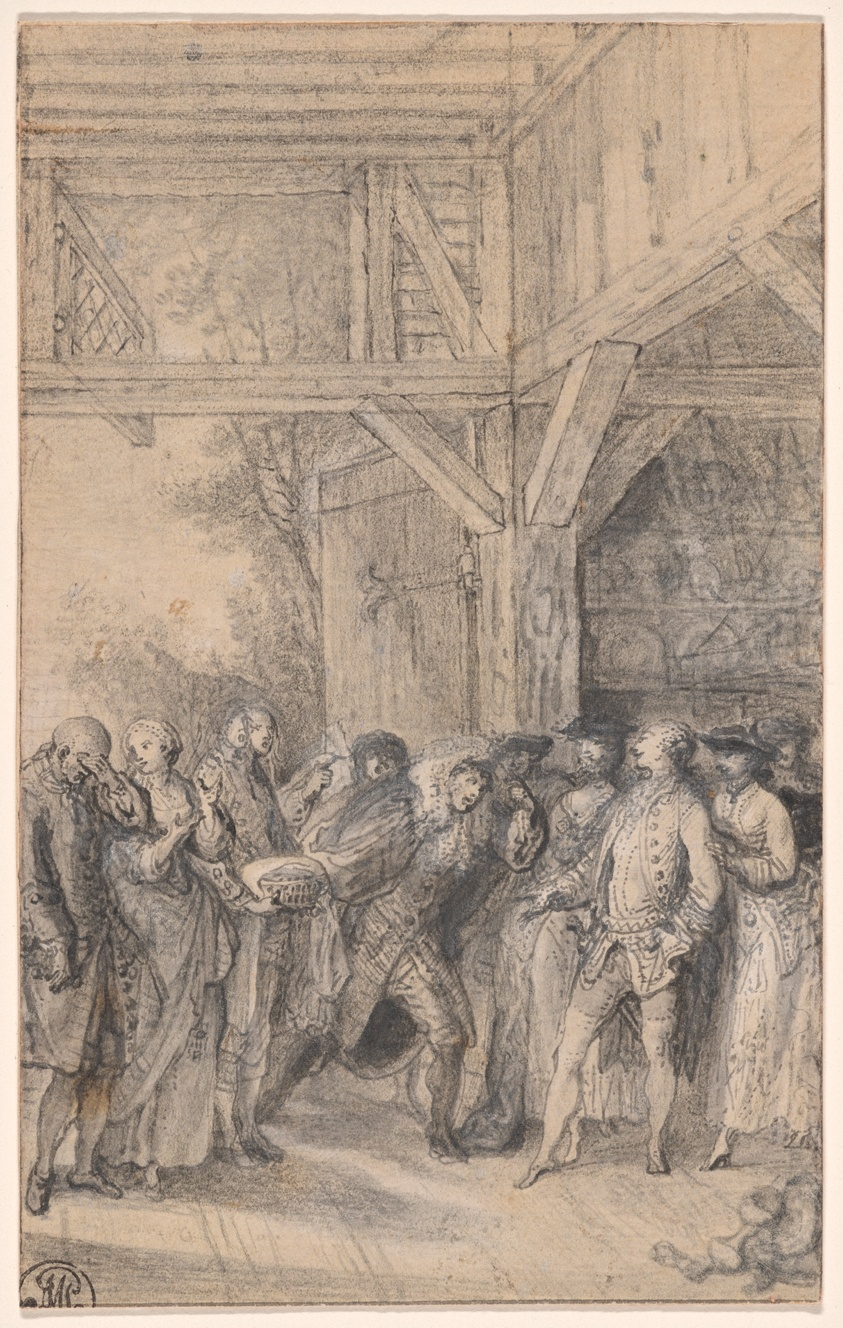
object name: Drawing and Watercolor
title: Farmer Requesting Permission to Marry a Nobleman's Daughter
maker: Gabriel Jacques de Saint-Aubin (French, 1724–1780)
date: 1761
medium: Graphite and pen and black ink, with touches of opaque, white watercolor on cream laid paper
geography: France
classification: prints and drawing; graphite; drawing; paper; pen and ink drawings